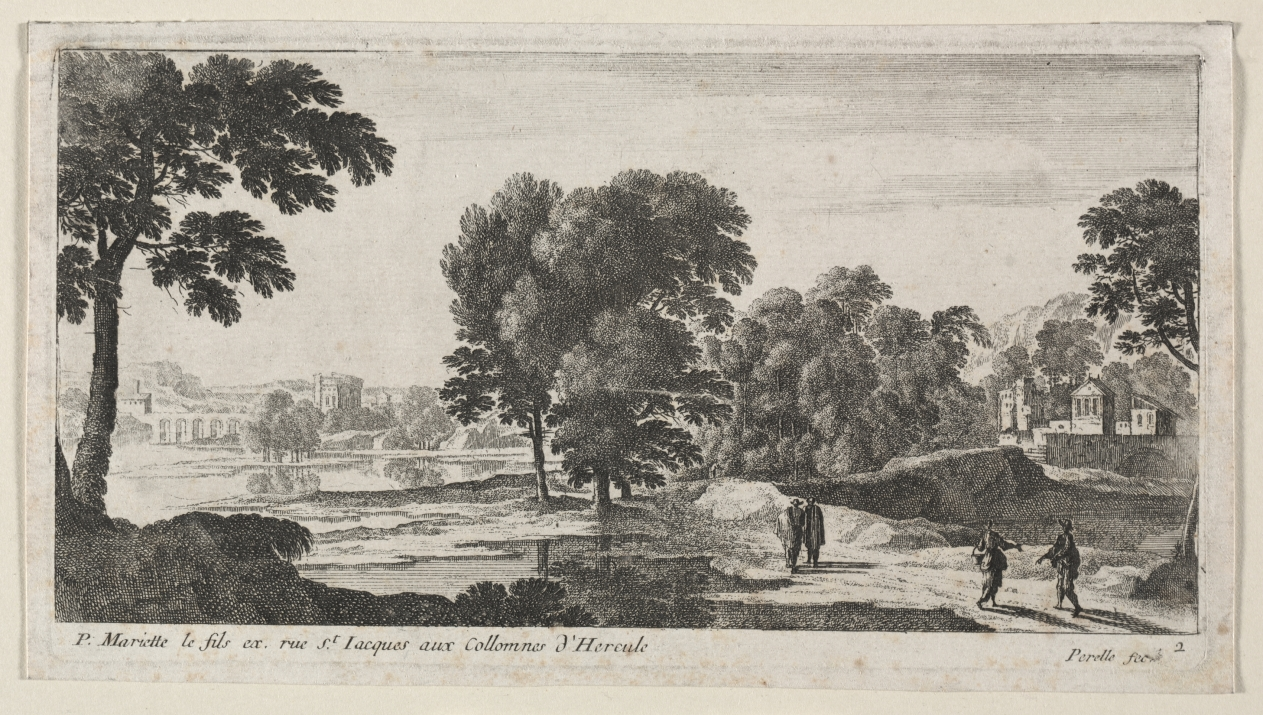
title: Landscape with Figures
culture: France, 17th century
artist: Gabriel Perelle (French, c. 1603–1677)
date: 1600s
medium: etching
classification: Print